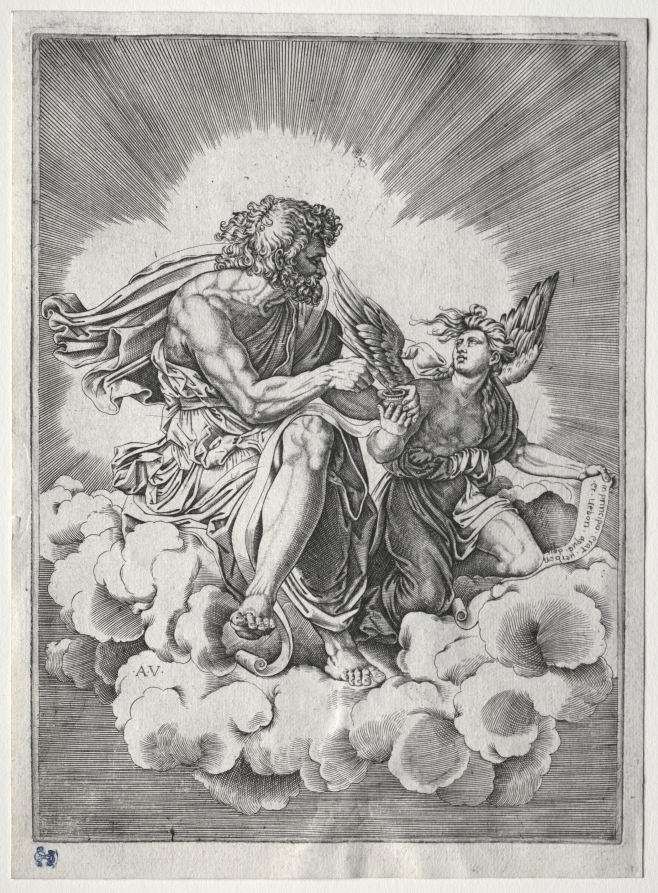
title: The Four Evangelists: St. Matthew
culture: Italy, 16th century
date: c. 1518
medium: engraving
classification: Print